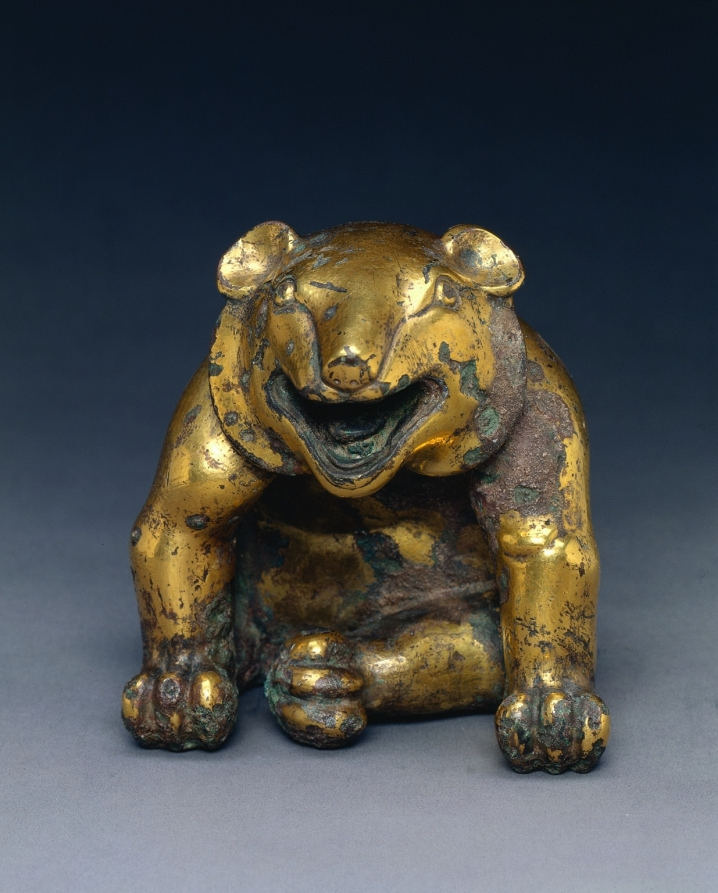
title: Mat Weight in the Form of a Bear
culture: China, Western Han dynasty (206 BCE–8 CE)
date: 202 BCE–9 CE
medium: gilt bronze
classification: Sculpture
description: The bear imagery was particularly popular during the Han dynasty and was a metaphor of heroic power. This heavy, solid bear was probably used as a mat weight; other small squatting bears often served as the legs of vessels.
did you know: Bear imagery, which symbolized heroic power, was particularly popular during the Han dynasty.